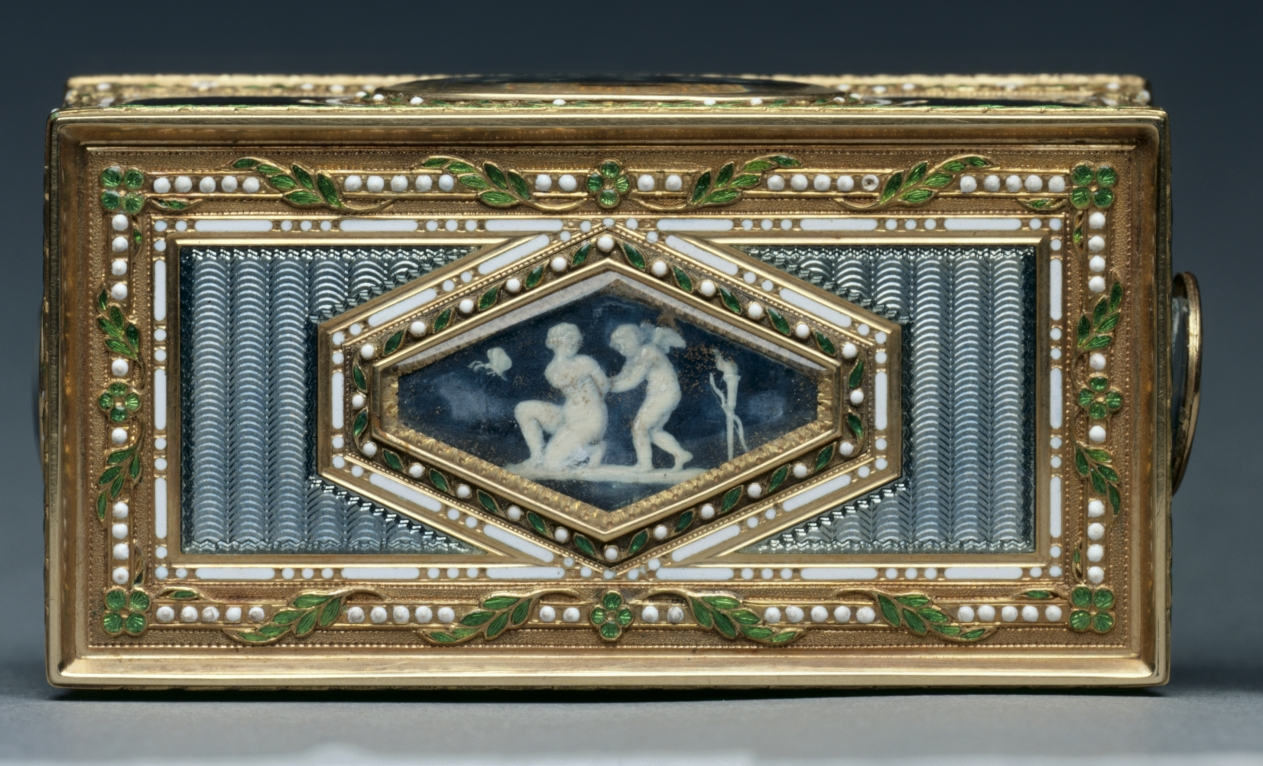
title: Snuff Box (Tabatière)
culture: France, 18th century (style of Louis XVI)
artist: François Chazeray (French)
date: 1777–78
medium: gold and enamel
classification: Metalwork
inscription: [Maker's mark of François Chazeray, master goldsmith in 1760, cover; bottom; front wall]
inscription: [Warden's mark (probably a crowned "O"), Paris, 1777-1778, cover; bottom; front wall]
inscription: [Illegible mark, bottom]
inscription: [Illegible mark, cover]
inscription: [Illegible charge mark, inside front]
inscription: [Discharge mark of Jean-Baptiste Fouache, Paris, 1774-1780, on neck at left.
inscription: [Outside of neck, modern inscription '4 (modern inscription]:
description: This box is decorated with figures of antiquity associated with love: winged cupids, dancing nymphs, and representations of the Greek goddess of love. These scenes are inspired by antique cameos, intricately carved gemstones crafted in ancient Greece and Rome. This interest in ancient iconography, symmetry, and classical compositions of gods and goddesses was characteristic of 18th-century neoclassicism.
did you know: Decorated with allegorical scenes of love, it is likely that this box was a present between lovers.